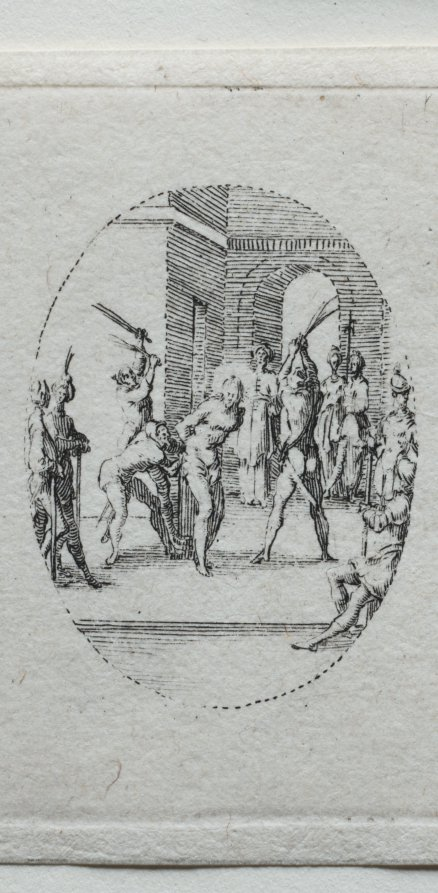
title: The Mysteries of the Passion: The Flagellation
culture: France, 17th century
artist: Jacques Callot (French, 1592–1635)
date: 1631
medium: etching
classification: Print